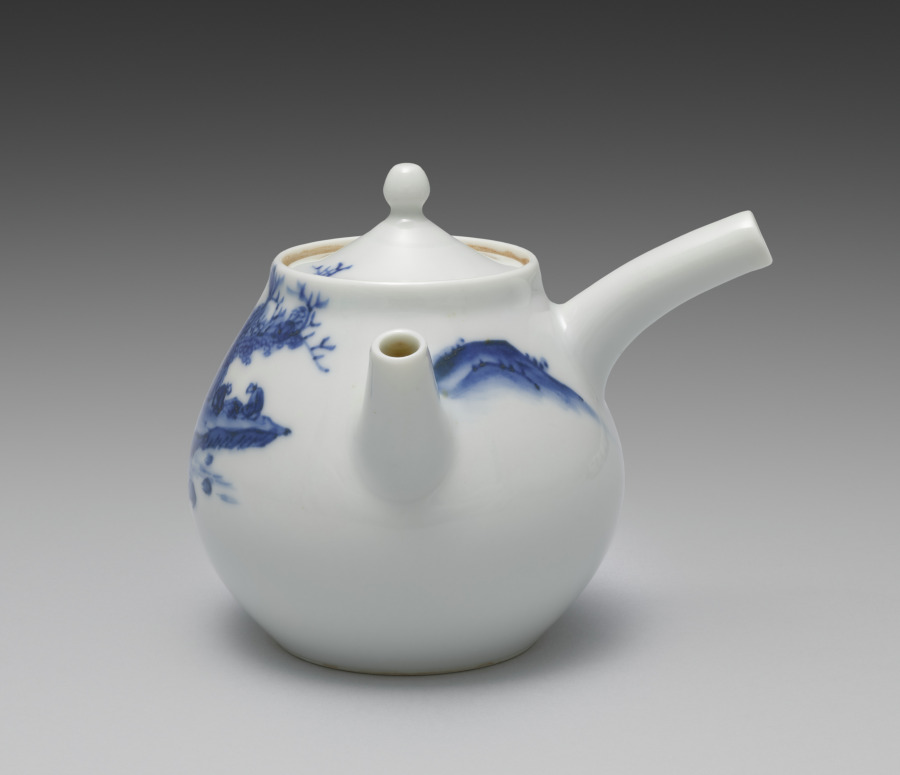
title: Teapot from Tea Set with Chinese Landscape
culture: Japan, Meiji period (1868–1912)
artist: Seifū Yohei III (Japanese, 1851–1914)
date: 1893–1914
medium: Porcelain with underglaze blue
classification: Ceramic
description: This tea set with idyllic lakeside Chinese landscapes has a side-handled pot called a kyūsu, used for steeping, straining, and serving tea. Unlike some others, this set also has a yuzamashi, a container used to cool boiled water to just the right temperature for the best flavor when steeping. Seifū Yohei III’s painting teacher, Tanomura Chokunyū (1814–1907), made a visual record of famous sencha events that shows how these kinds of porcelains fit with objects such as a stove and kettle to form a complete set of utensils for tea preparation, and with ensembles of decorative objects meant to inspire creativity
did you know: The teapot depicts two friends playing a board game on a promontory beyond a two-storied residence, while another figure comes across the entry bridge bearing bags of provisions, hung from the ends of a pole balanced across his shoulders.